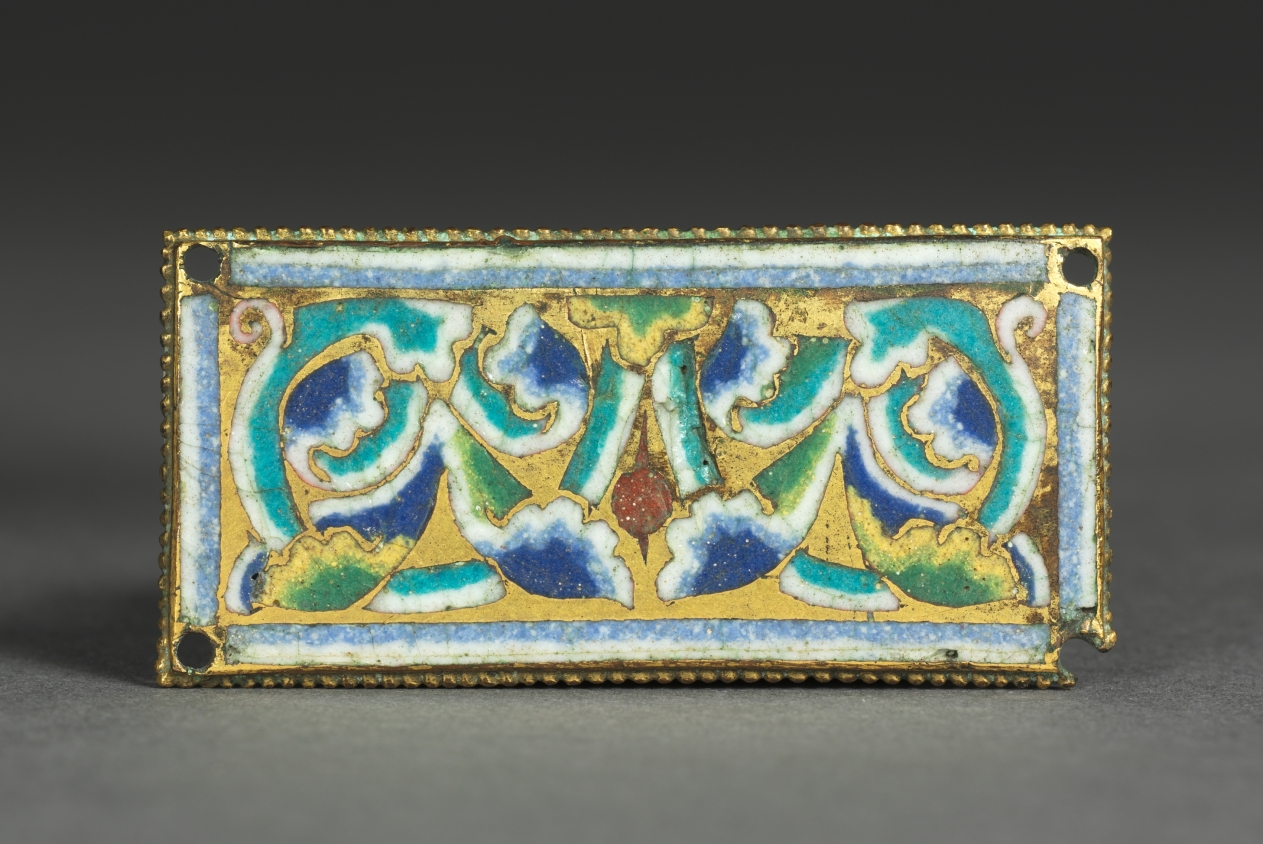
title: Plaque from a Reliquary Shrine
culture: Germany, Rhine Valley, Cologne, Romanesque period, 12th century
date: c. 1180–1190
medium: gilded copper; champlevé and cloisonné enamel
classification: Enamel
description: These decorative enamel plaques (1953.274, 1953.638, 1957.502, and 1961.27) have been linked to some of Cologne's most important reliquary shrines, namely the shrine of the Three Kings at Cologne Cathedral and the shrines of Saints Maurinus and Albinus in the Benedictine abbey church of Saint Panteleon.